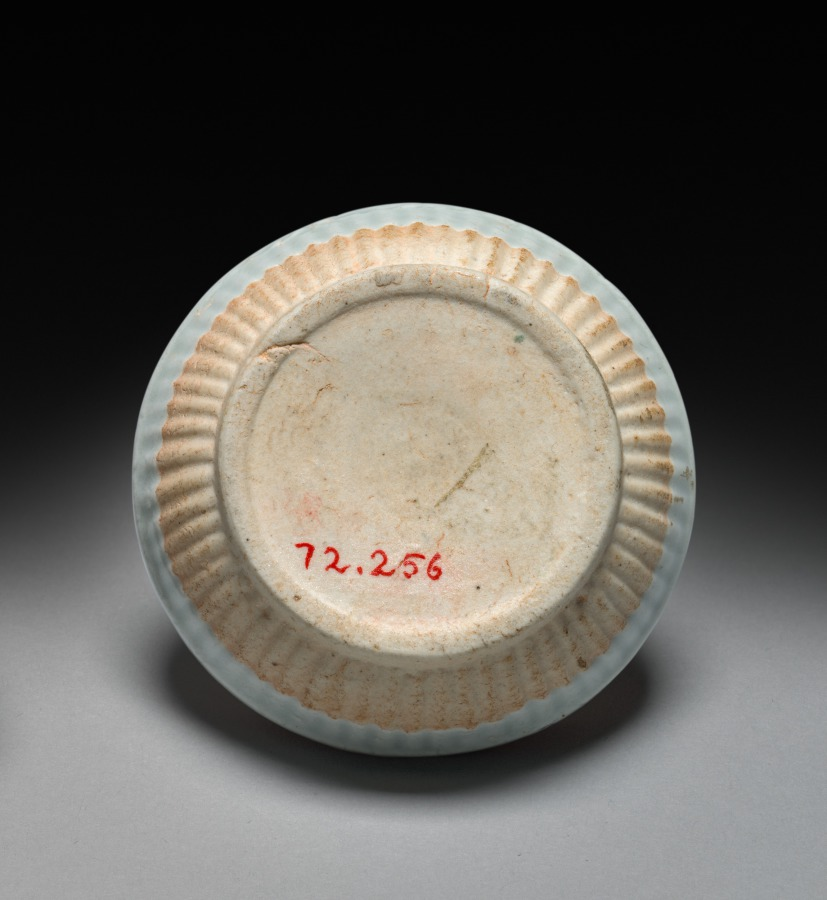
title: Circular Box: Qingbai Ware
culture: China, Southern Song Dynasty (1127-1279) - Yuan Dynasty (1271-1368)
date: 1200s-1300s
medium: glazed porcelain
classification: Ceramic